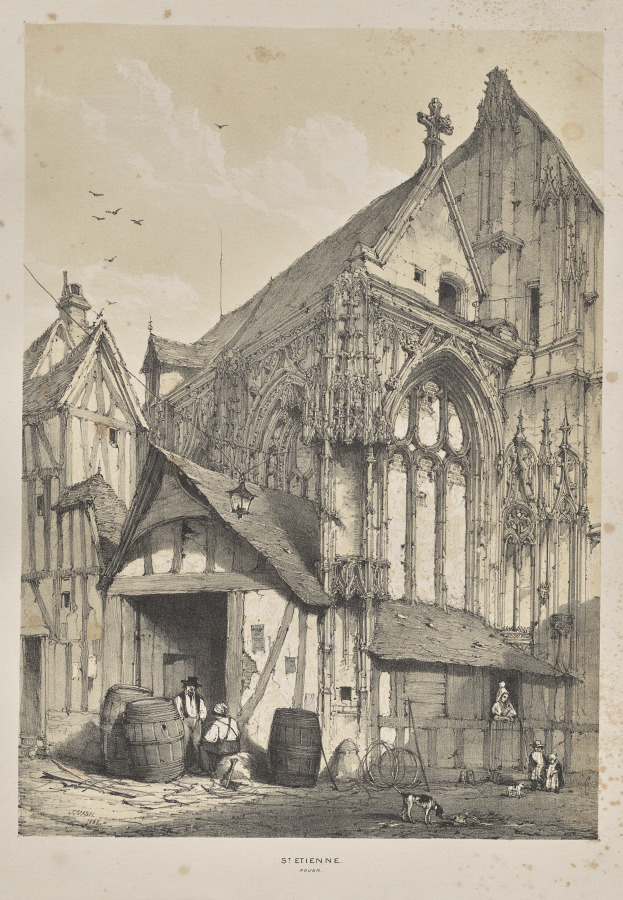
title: Architecture of the Middle Ages: St. Etienne, Rouen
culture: England, 19th century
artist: Joseph Nash (British, 1808–1878)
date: 1838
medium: lithograph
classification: Print